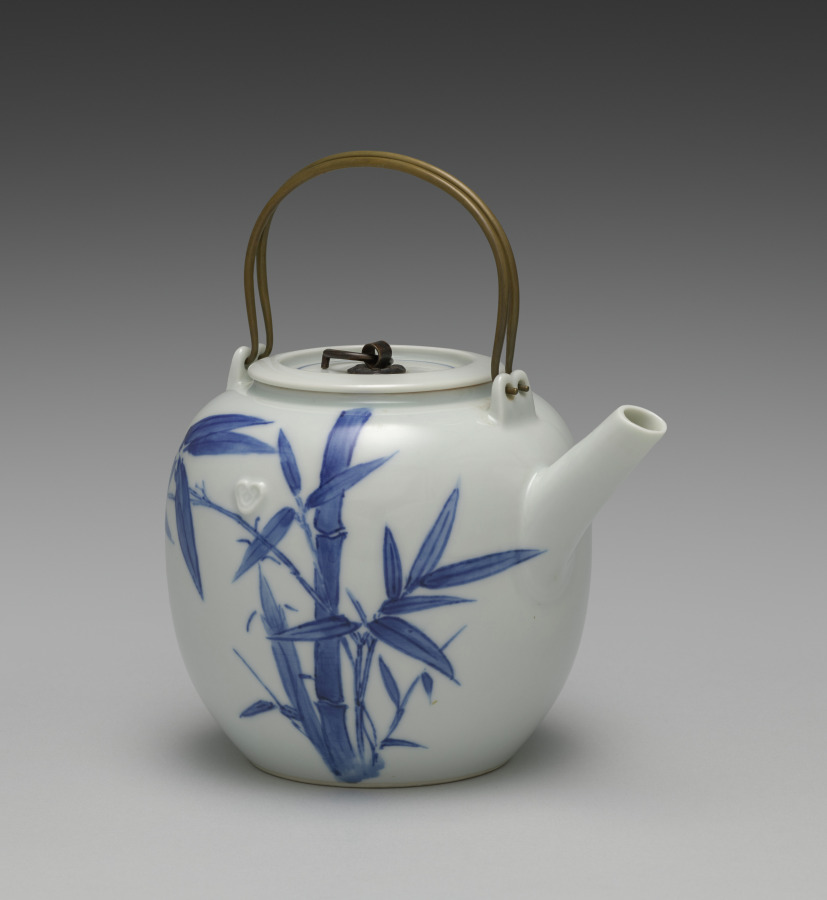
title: Teapot with Bamboo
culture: Japan, Taishō period (1912–26) or Shōwa period (1926–89)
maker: Seifū Yohei IV (Japanese, 1872–1951)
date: 1914–46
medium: Porcelain with underglaze blue, molded design and metal handles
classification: Ceramic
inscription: 清風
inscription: 清風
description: This teapot has a well-balanced design of bamboo in underglaze blue and nyoi staff-head motifs applied to both sides at the shoulder.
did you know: There is a seal on the base of the teapot.